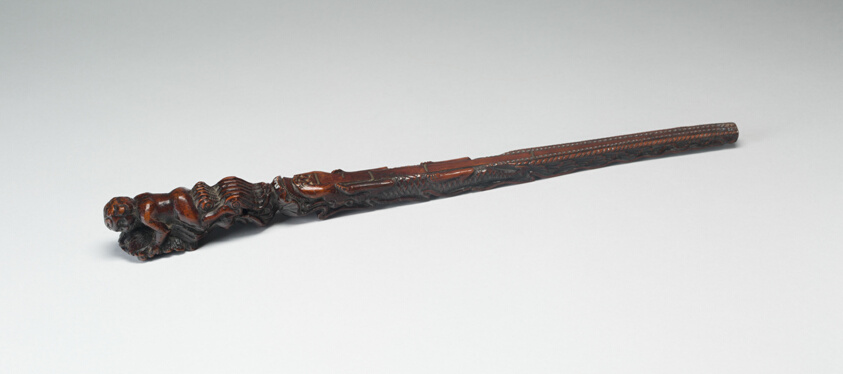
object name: Decorative Arts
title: Measuring Stick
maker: France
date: 1765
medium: Wood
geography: France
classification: tool; european decorative arts; decorative arts